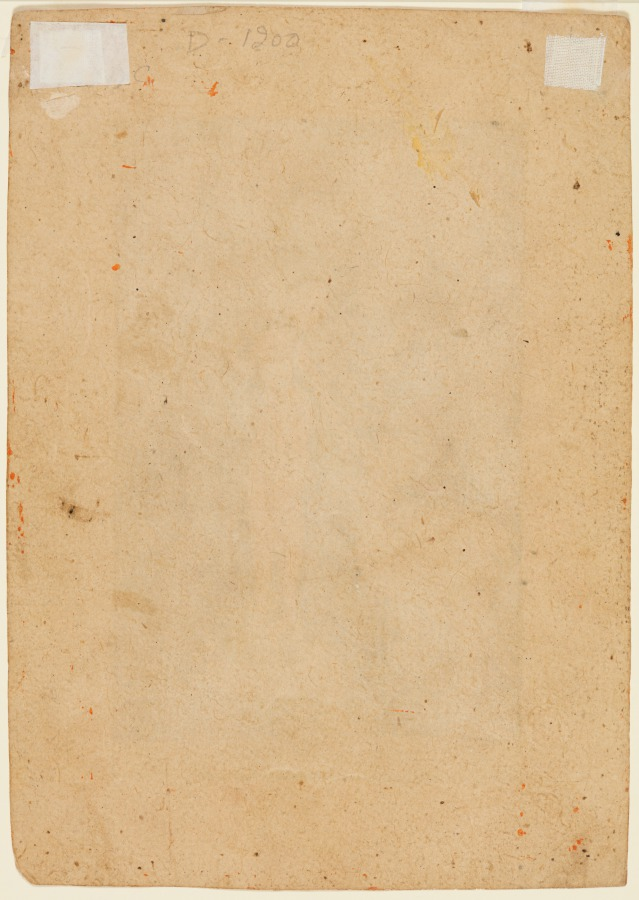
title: Heroine with attendant and a pair of deer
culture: Northern India, Pahari kingdoms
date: c. 1710–20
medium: gum tempera on paper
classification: Painting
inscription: D – 1200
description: A heroine’s ardor for her absent lover is so strong that it attracts a deer and doe, otherwise shy animals. The woman holding a stringed instrument at the right signals that this scene has a musical theme. Intensely staring gazes, the heroine’s elongated legs, the impossible turn of her head in the opposite direction as her feet, and the unaided dance of her hems add to the miraculous quality of the scene.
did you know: The lady fondling the deer is adorned in a transparent muslin shawl.